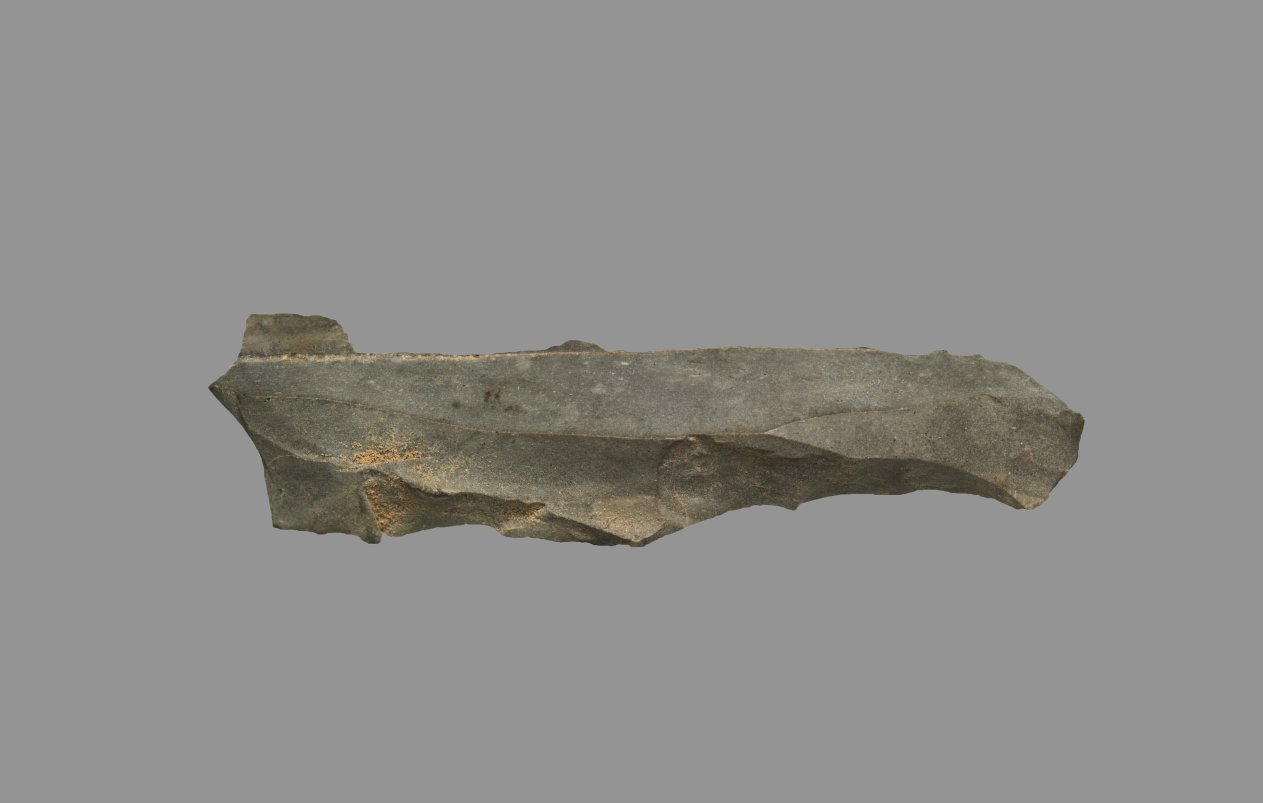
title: Sickle Blade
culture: Egypt, Middle Kingdom (2040–1648 BCE), Dynasty 12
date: 1980–1801 BCE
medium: flint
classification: Implements